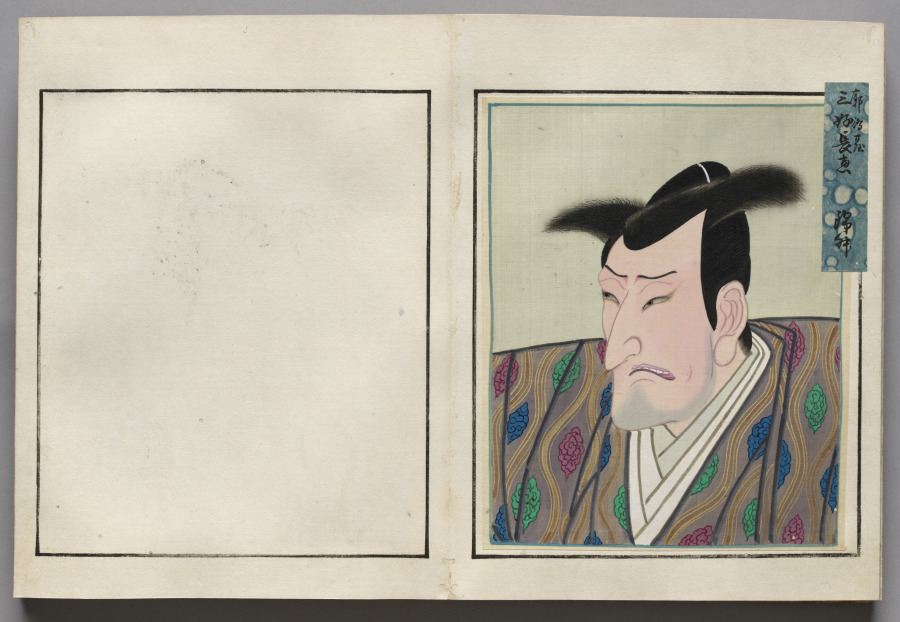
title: Double-Leaf from Album of Actor Portraits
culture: Japan, Edo period (1615–1868)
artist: Shōrakusai (Japanese)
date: c. 1790–1810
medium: double-leaf from an accordion-style album; ink and color on silk (right)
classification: Bound Volume